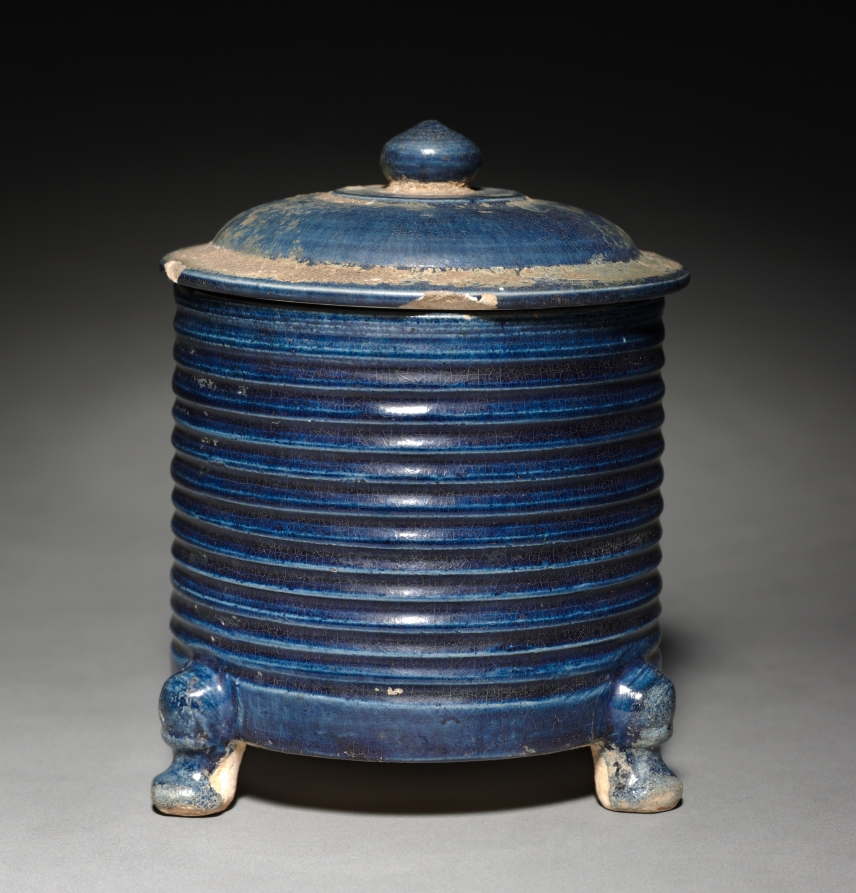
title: Covered Jar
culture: China, Tang dynasty (618–907)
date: early 700s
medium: glazed earthenware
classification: Ceramic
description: This covered cylindrical jar with three animal feet is lavishly covered with a cobalt blue glaze in the exterior and an amber glaze in the interior. Of the colored lead glazes of sancai (three-color) ware, blue was preeminent and precious. Imported cobalt from Persia (Iran, Afghanistan) was used as a glaze colorant that yields a rich, brilliant blue of considerable splendor.